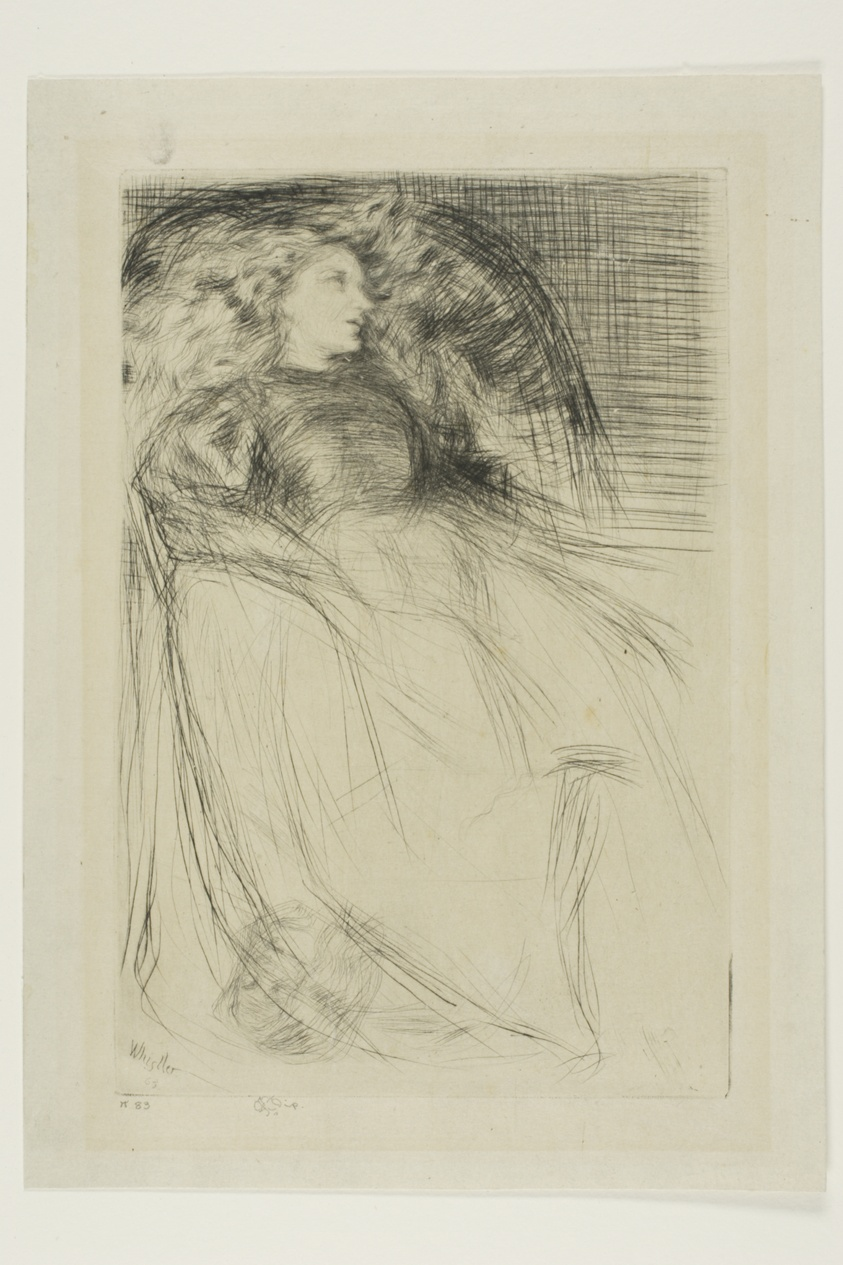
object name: Print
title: Weary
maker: James McNeill Whistler (American, 1834-1903)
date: 1863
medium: Drypoint in black ink on cream wove paper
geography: United States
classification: drypoint; print; prints and drawing; paper